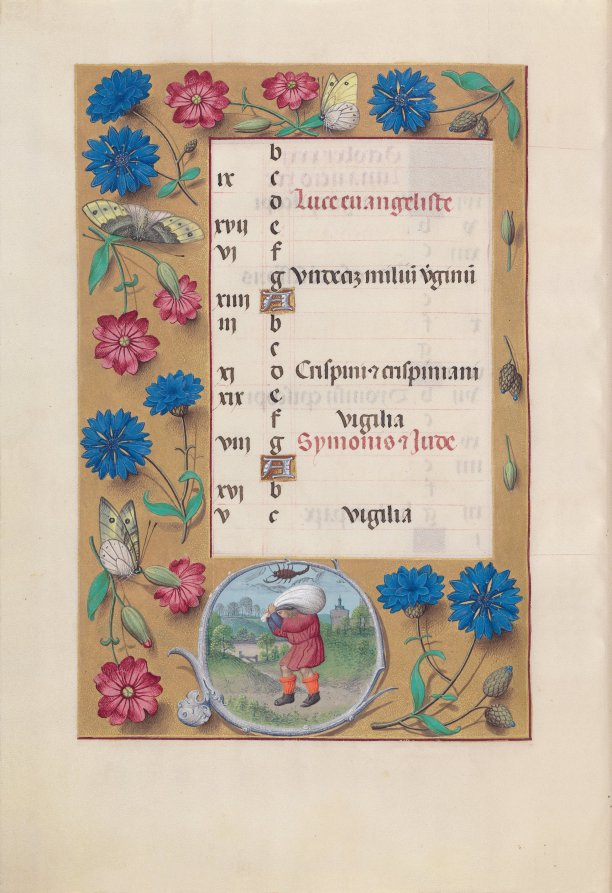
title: Hours of Queen Isabella the Catholic, Queen of Spain: Fol. 11v, October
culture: Flanders, Ghent and Bruges, late 15th century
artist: Master of the First Prayerbook of Maximillian (Flemish, c. 1444–1519)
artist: and Associates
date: c. 1500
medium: ink, tempera, and gold on vellum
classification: Bound Volume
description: This manuscript was illuminated by a circle of at least five highly organized manuscript painters active in the Flemish cities of Ghent and Bruges. The principal illuminator was Alexander Bening, who painted the majority of the book's miniatures. Manuscripts produced by this circle of artists are renowned for the decoration of their borders, which typically feature a rich variety of realistically-painted flowers, birds, and butterflies. This prayer book, called a book of hours, was intended not for a cleric, but for the private devotions of a lay person-in this case, Isabella the Catholic, Queen of Spain (1451-1504). Isabella's coat of arms embellishes the book's frontispiece. It is unlikely that the book was commissioned by the Queen herself; rather, she probably received it as a diplomatic gift from someone courting her patronage, perhaps Cardinal Francisco Jimenez de Cisneros. A Franciscan friar, Jimenez was dependent upon Isabella for his advancement, first to the post of Queen's confessor in 1492, and then to Archbishop of Toledo in 1495.